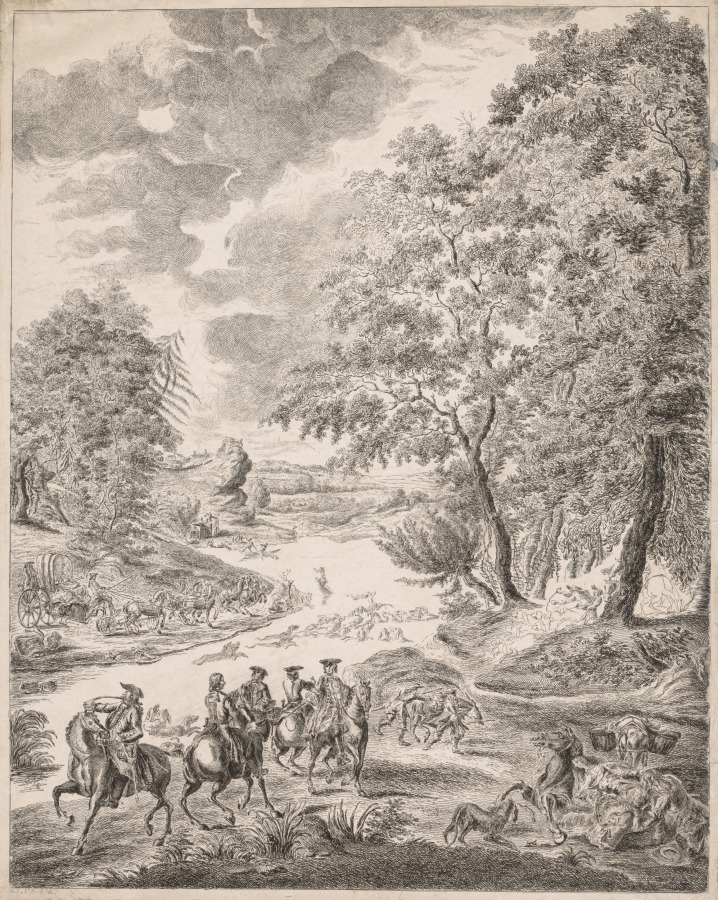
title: The Deer Hunt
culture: France, 18th century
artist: Augustin de Saint-Aubin (French, 1736–1807)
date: c. 1752–1807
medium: etching and engraving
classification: Print